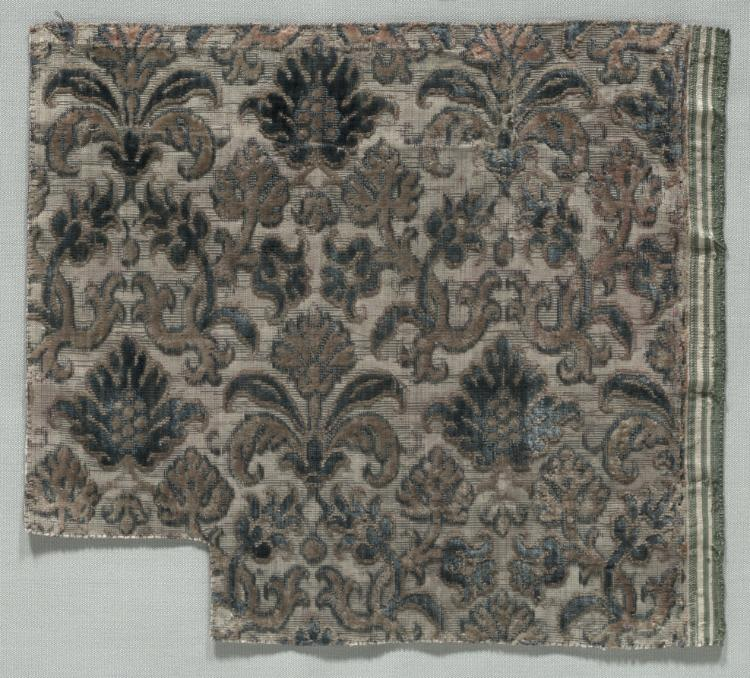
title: Velvet Fragment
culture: Italy, 17th century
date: 1600s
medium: velvet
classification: Velvet